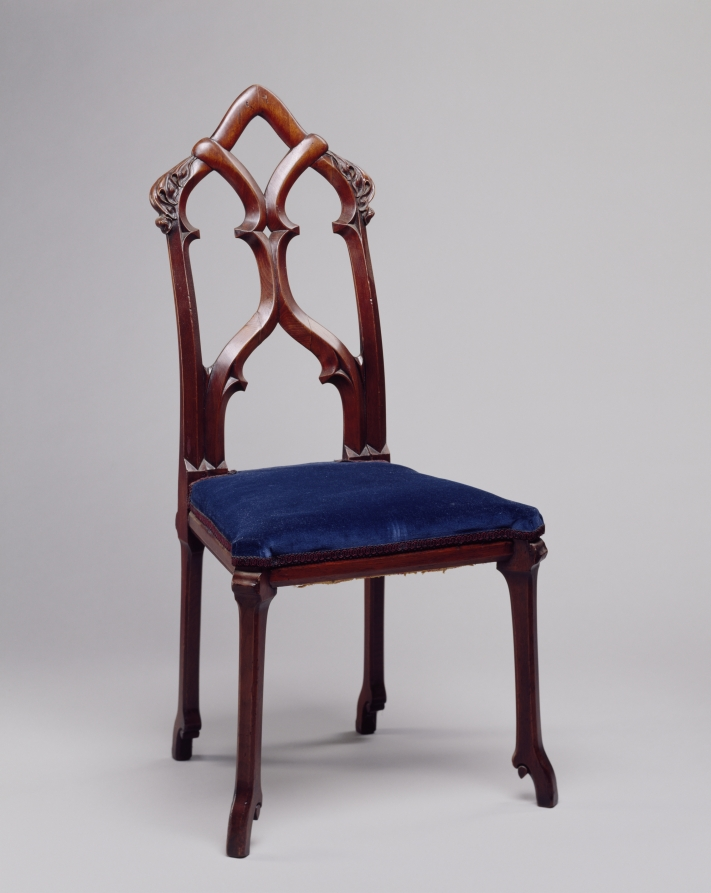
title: Side Chair: Gothic Revival Style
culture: America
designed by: Alexander Jackson Davis (American, 1803–1892)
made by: William Burns (American, 1805?–1867)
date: c. 1858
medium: wood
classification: Furniture and woodwork